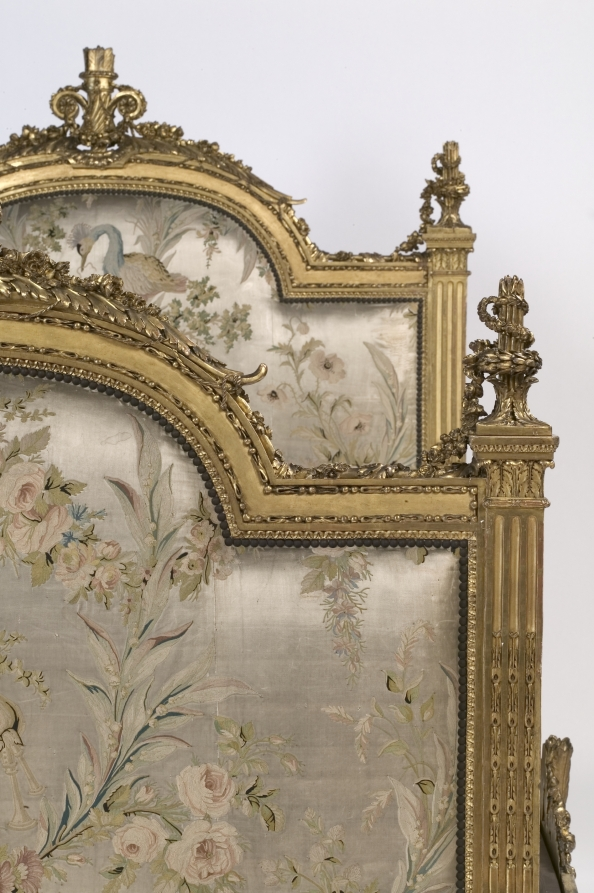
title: Bed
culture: France, 18th century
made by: attributed to Georges Jacob (French, 1739–1814)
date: 1700s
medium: gilded wood and embroidered satin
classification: Furniture and woodwork